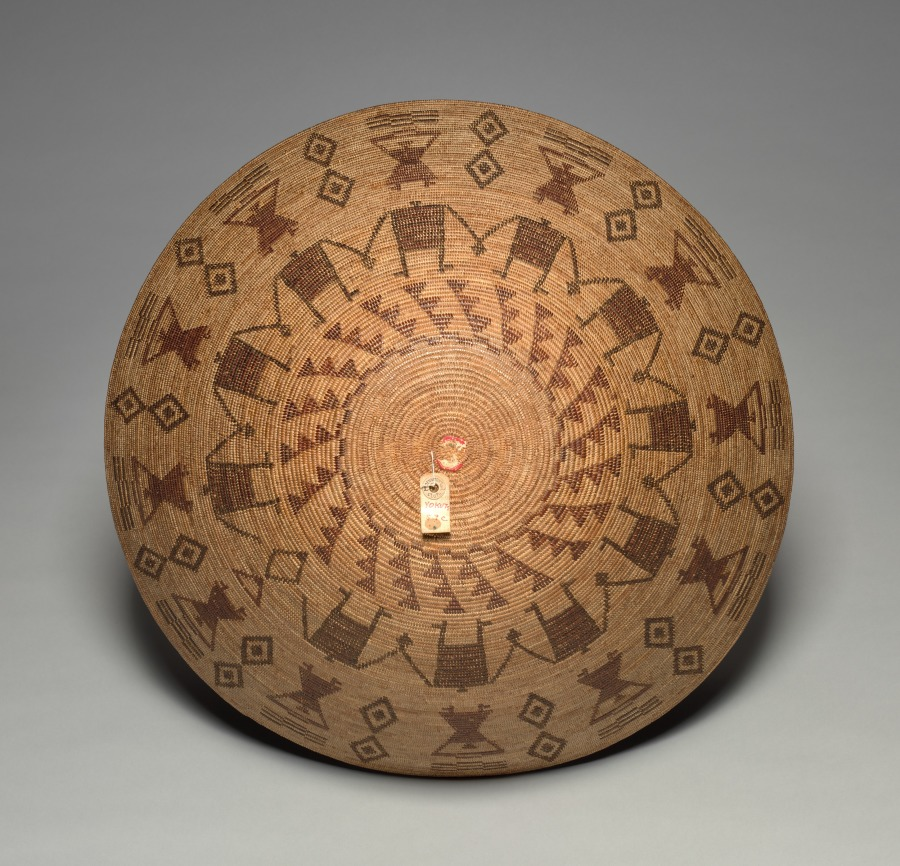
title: Presentation Bowl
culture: Native North America, California, Yokuts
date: 1900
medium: redbud, bracken fern; coiled, grass foundation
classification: Basketry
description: This fine bowl was created by a weaver of the Yokuts, who lived in California’s San Joaquin Valley to the west of Koso (Panamint) Shoshone territory. Shared design motifs indicate contact between the two areas. For instance, the humans who appear to be holding hands in one register on this basket also occur on a small Koso (Panamint) Shosone basket in the collection.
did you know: This fine bowl was created by a weaver of the Yokuts, who lived in California’s San Joaquin Valley.